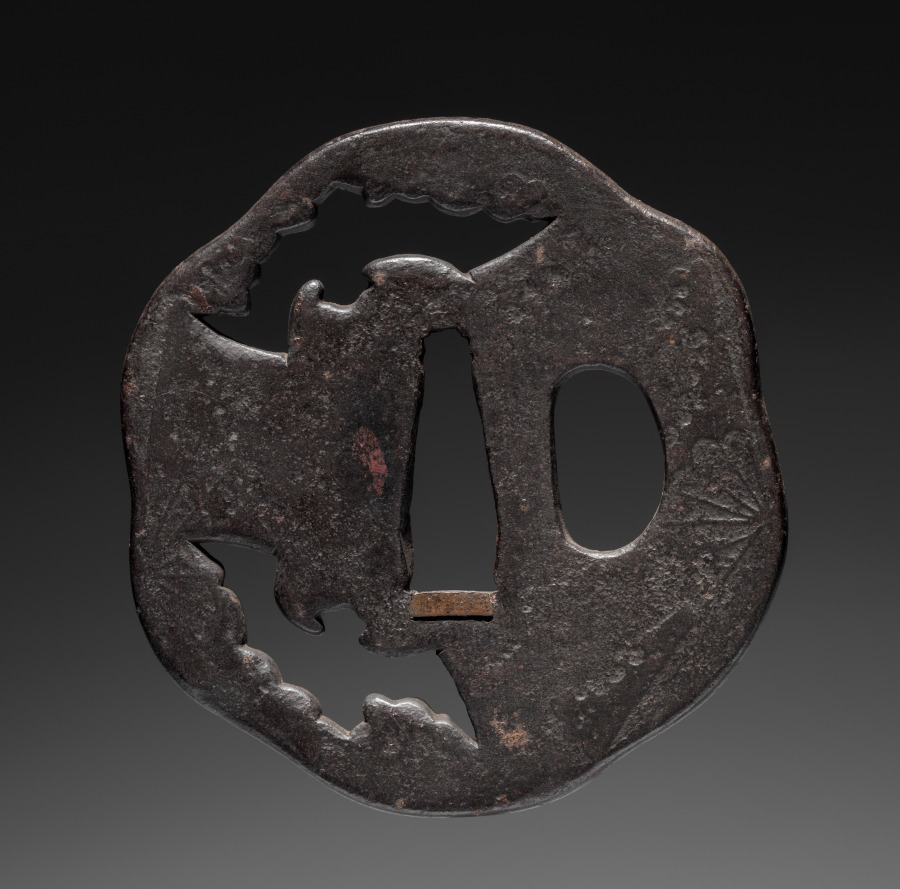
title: Sword Guard (Tsuba) with Bats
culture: Japan, possibly Edo period (1615-1868)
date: c. 1615–1868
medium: iron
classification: Arms and Armor